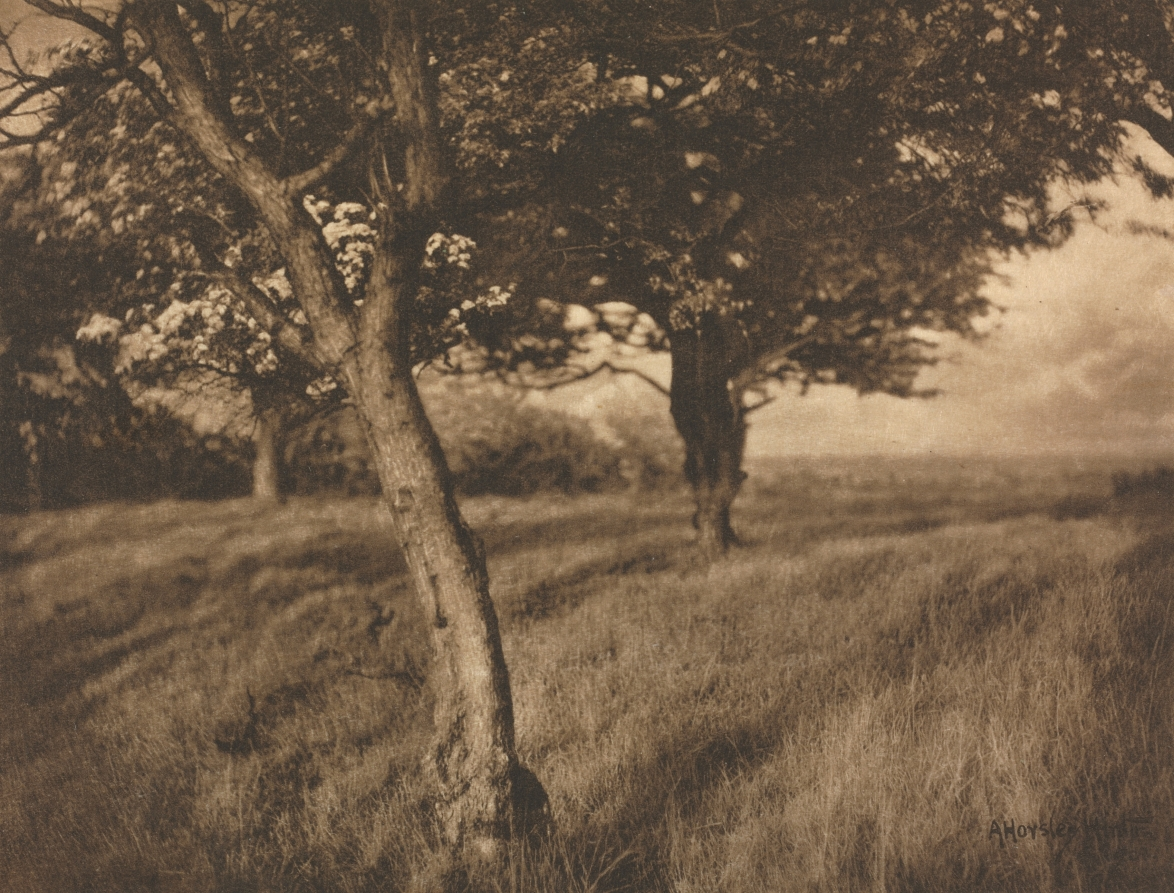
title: Camera Work: Beyond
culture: England, 20th century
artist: A. Horsley Hinton (British, 1863–1908)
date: 1905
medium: photogravure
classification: Bound Volume